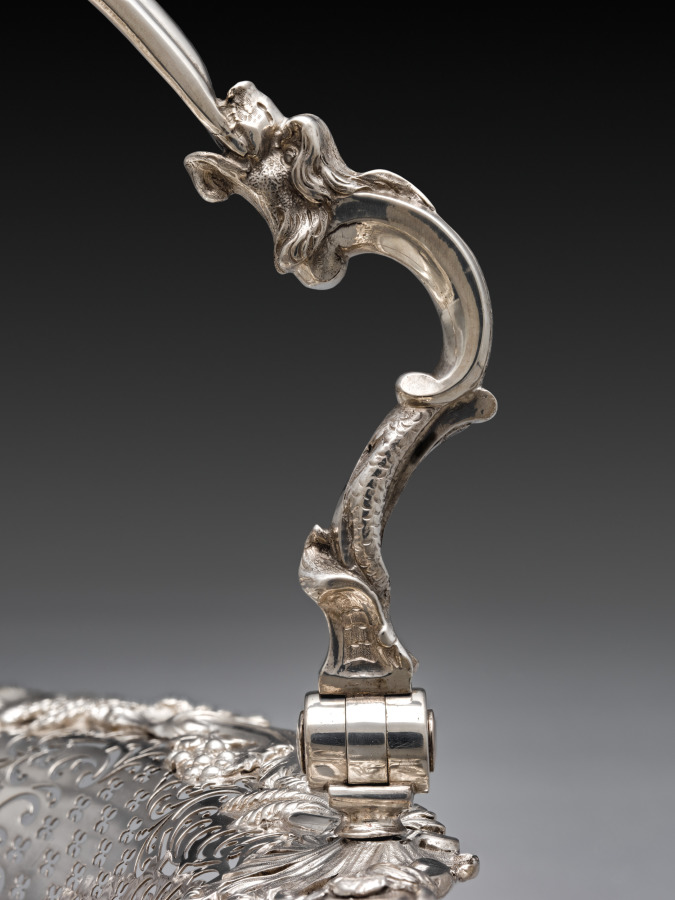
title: Cake Basket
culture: Britain, London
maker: Samuel Herbert and Company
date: 1753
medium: Silver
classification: Silver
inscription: “H/I I”; hallmark for London, George II, Samuel Herbert and Henry Bailey, and date 1753.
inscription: “To/H.H.M./from/S.K., E.W.G., J.H.J., D.R.L., M.B.R./on the occasion of his/Silver Wedding/1911-1936”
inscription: “50-2”; hallmark for London, George II, Samuel Herbert and Henry Bailey, and date 1753.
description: Drinking tea at the end of the day, accompanied by sweet cakes and savory delights, became an established ritual in Britain at all levels of society during the 1700s. In grand houses, silver teapots, caddies, and cake baskets elevated this afternoon refreshment to a formal gathering.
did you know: Sheaves of wheat adorning the rim of this basket allude to the flour used in pastries and cakes for tea.